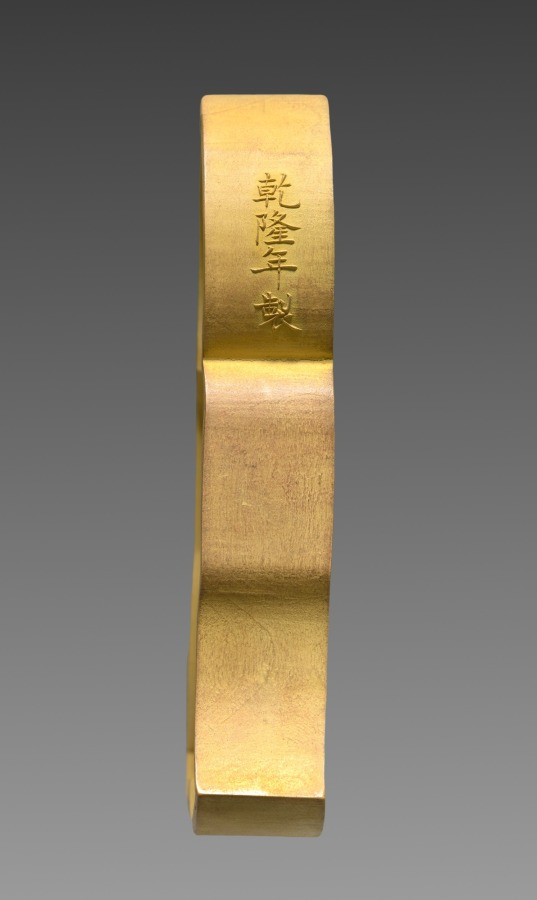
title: Ink Stick from an Imperially Commissioned Set of Ink Stick with Images and Poems of Famous West Lake Sites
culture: China, Qing dynasty (1644–1911), Qianlong reign (1736–95)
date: 1780–94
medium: Molded ink in yellow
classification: Miscellaneous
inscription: 乾隆年製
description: This is one of ten ink cakes of different shapes and colors stored in an exquisite lacquer box. Each is inscribed in gold with a poem by the Qianlong emperor, praising the ten famous sights of the Westlake in Hangzhou, near Shanghai. The Westlake is famous for its natural beauty; it was a favorite imperial destination and remains a tourist attraction today. Ink cakes (also called ink sticks) are dissolved with the addition of water and ground on the surface of a flat stone into liquid ink for painting and calligraphy. The precious ink cakes here, however, have never been used.